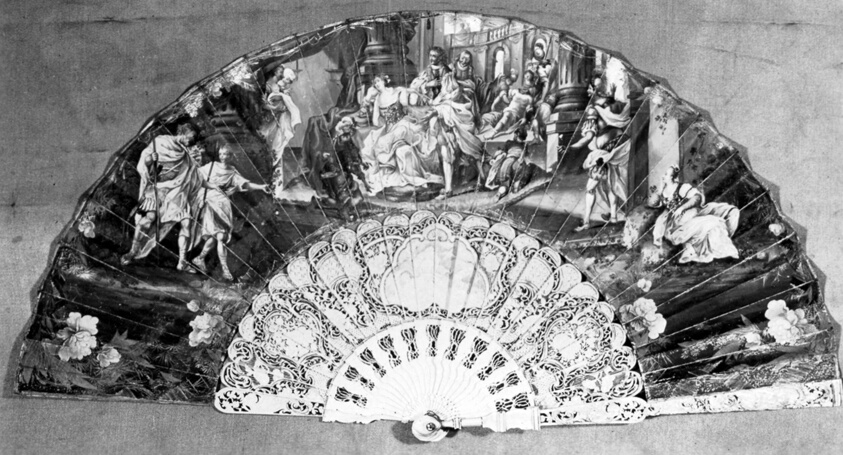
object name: Costume and Accessories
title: Fan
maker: France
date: 18th century, Louis XVI period (1774–1793)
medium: Carved, pierced and gilded ivory sticks; painted paper mount; rhinestone rivet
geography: France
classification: textile; fan - paper; costume accessory - folding fan; costume accessory; costume